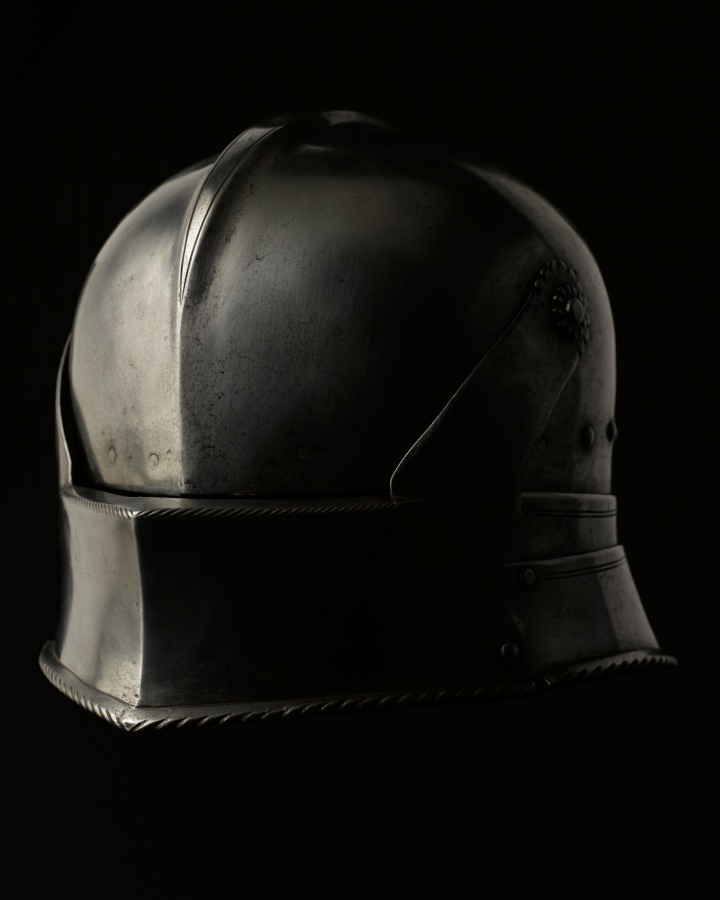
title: Visored Sallet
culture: Germany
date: c. 1490–1500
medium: steel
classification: Arms and Armor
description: The sallet is a partly open-face helmet common in Europe during the 1400s, used in both equestrian and infantry versions. Sallets with movable visors, like this example, are considered to be more technically and visually interesting; beautifully streamlined, it assumes a highly sculptural teardrop shape. Originally it would have been part of a complete suit of armor. The sallet became the quintessential helmet form of the late Middle Ages and is frequently represented in medieval miniatures and woodcuts.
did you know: Medieval sallets were design inspiration for modern-day fireman's helmets.